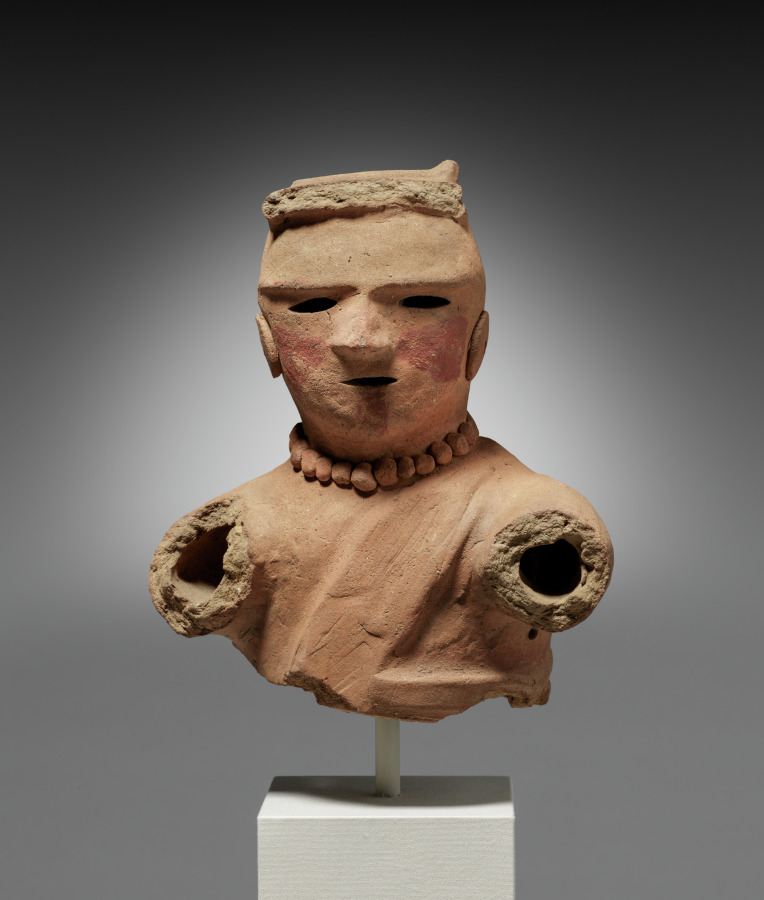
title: Haniwa Figure of a Female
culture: Japan, Kofun period (300–710 CE)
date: 500s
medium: earthenware with traces of pigment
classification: Sculpture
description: Figures in a variety of dress including military and ceremonial garb start to appear on Japanese earthen mounded tombs called old mounds (kofun) from the 400s to 500s CE. This fragment depicts a woman with red triangles on her face and wearing jewelry. Archaeologists speculate that the facial markings had a ritual or symbolic function, perhaps indicating she is a female shaman. Many figures of this kind have been found in digs in the Kanto region of eastern Japan. We can only guess at the meaning of the clay cylinders called haniwa.